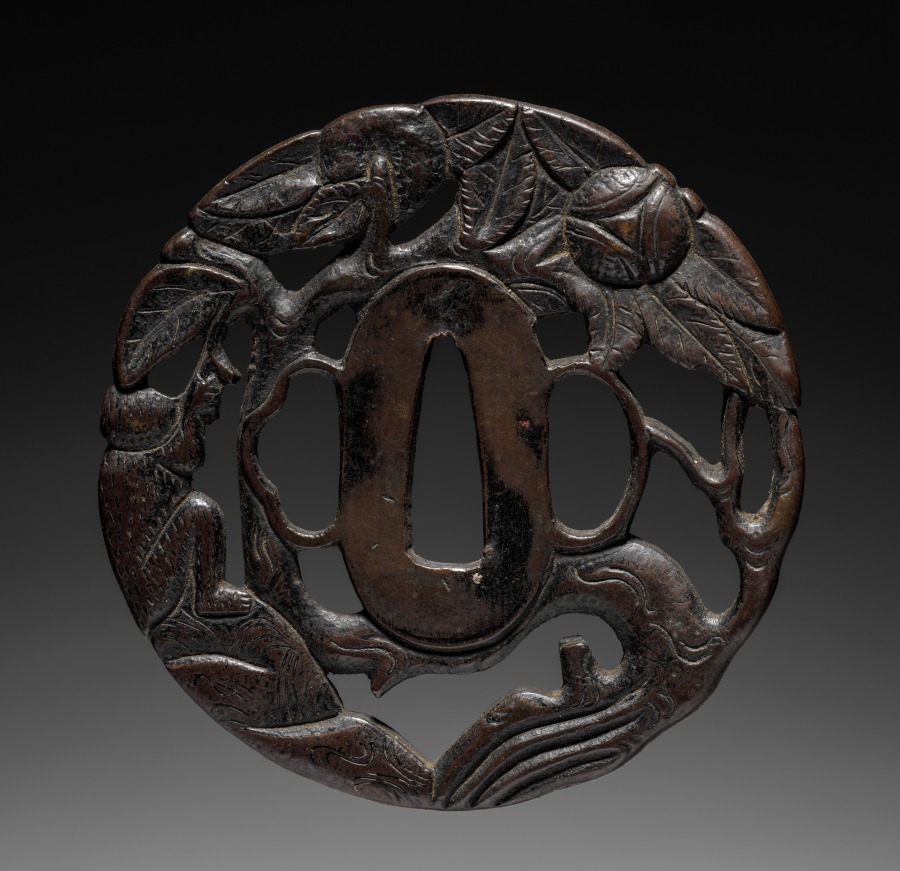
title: Sword Guard (Tsuba) with Monkey by Tree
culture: Japan, possibly Edo period (1615–1868)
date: c. 1615–1868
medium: metal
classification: Arms and Armor